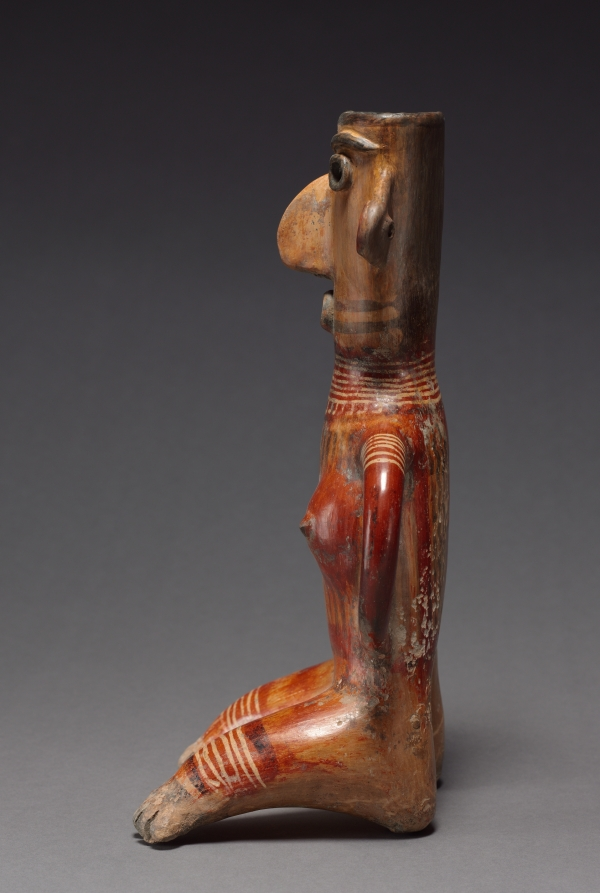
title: Seated Female Figure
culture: Mexico, Jalisco, Zacatecas style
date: 100 BCE–300 CE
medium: pottery with burnished, colored slips, resist patterning, and possibly post-fire painting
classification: Sculpture